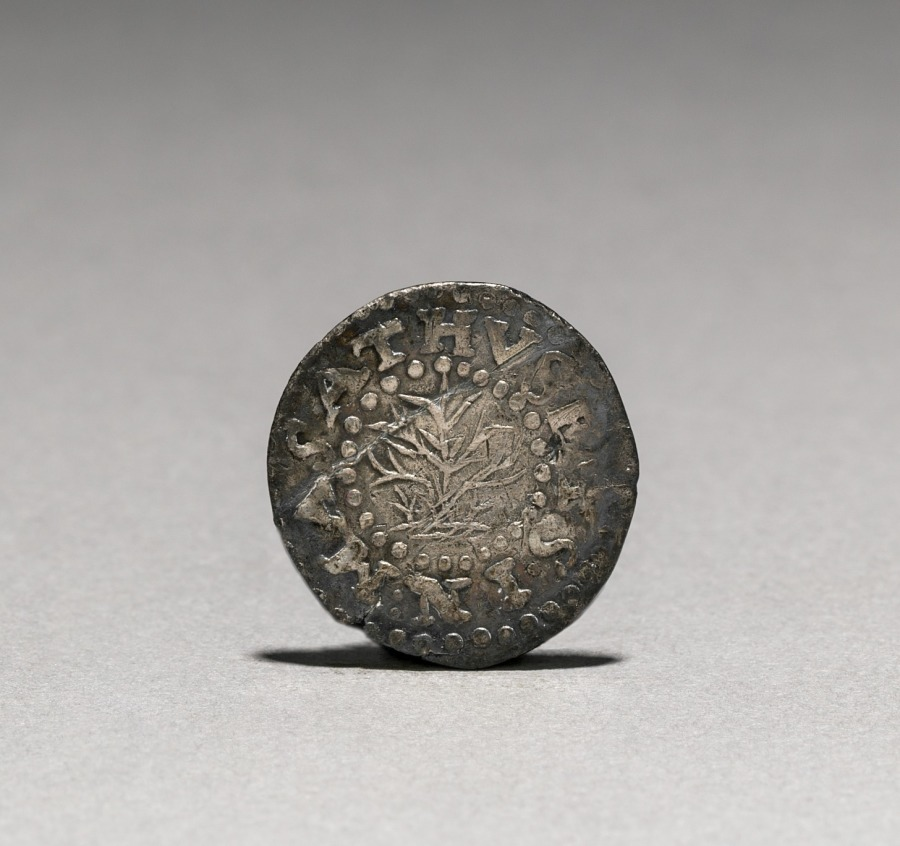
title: Oak Tree Two Pence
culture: America, Massachusetts, Boston, 17th century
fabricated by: John Hull (American, 1624–1683)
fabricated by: Robert Sanderson (American, 1609–1693)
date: 1662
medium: silver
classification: Coins